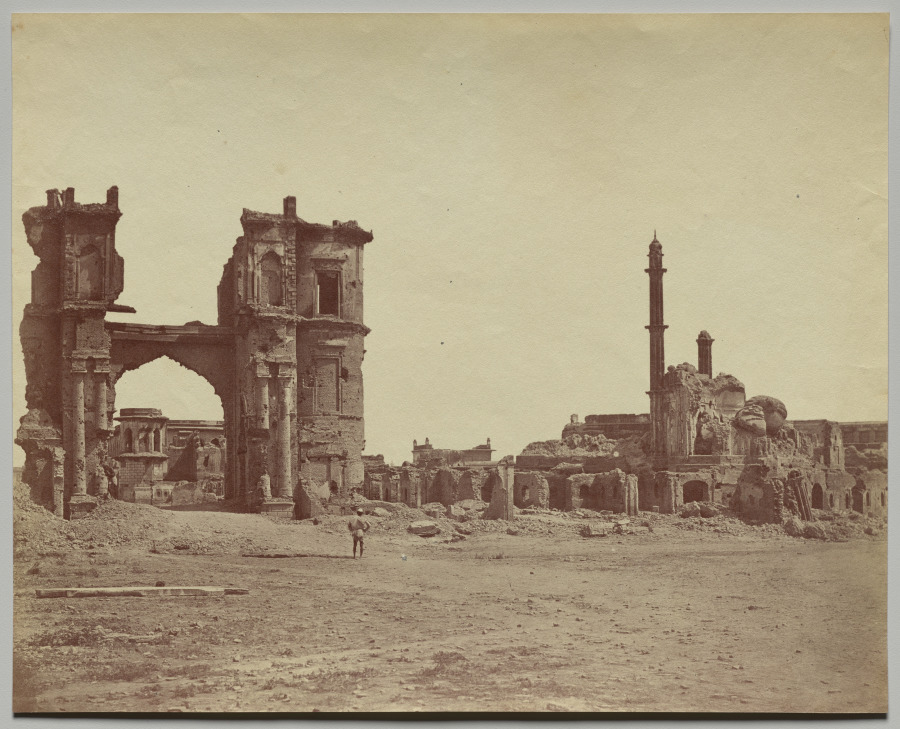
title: The Clock Tower in Front of the Bailee Guard Gate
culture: England, 19th century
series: Lucknow After the Siege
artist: Felice A. Beato (British, 1832–1909)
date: 1858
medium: albumen print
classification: Photograph